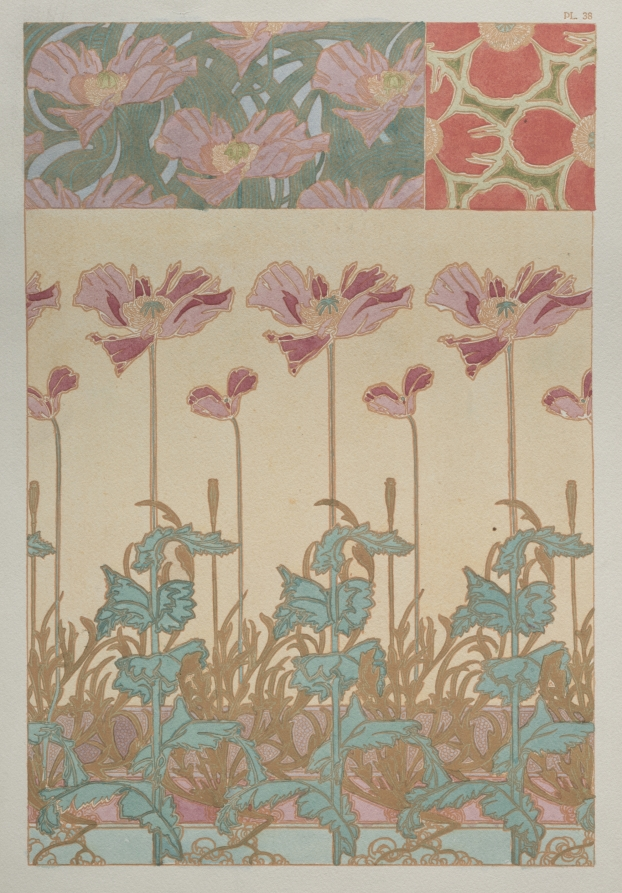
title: Documents Decoratifs: Oriental Poppies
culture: Czechoslovakia, late 19th-early 20th century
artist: Alphonse Mucha (Czech, 1860–1939)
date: 1901–2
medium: lithograph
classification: Print